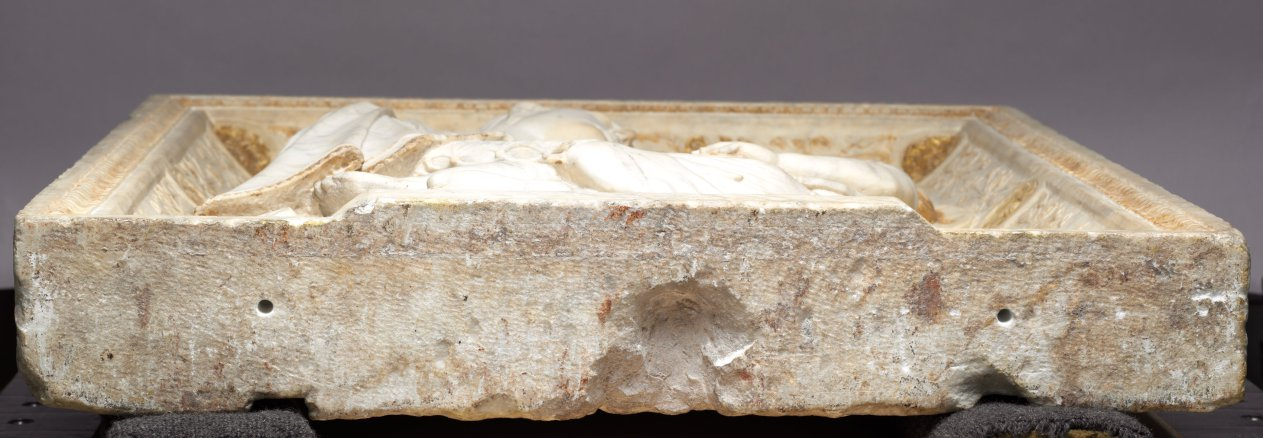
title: Madonna and Child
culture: Italy, Rome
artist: Mino da Fiesole (Italian, c. 1430–1484)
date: by 1461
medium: marble with traces of gilding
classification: Sculpture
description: This relief is one of four produced for the ciborium (canopy) erected by Cardinal Guillaume d'Estouteville over the high altar of the church of Santa Maria Maggiore in Rome. The ciborium was taken apart in 1747 and the other three panels--Christ Blessing, The Annunciation, and Saints Peter and Paul--were set into the walls of the sacristy.